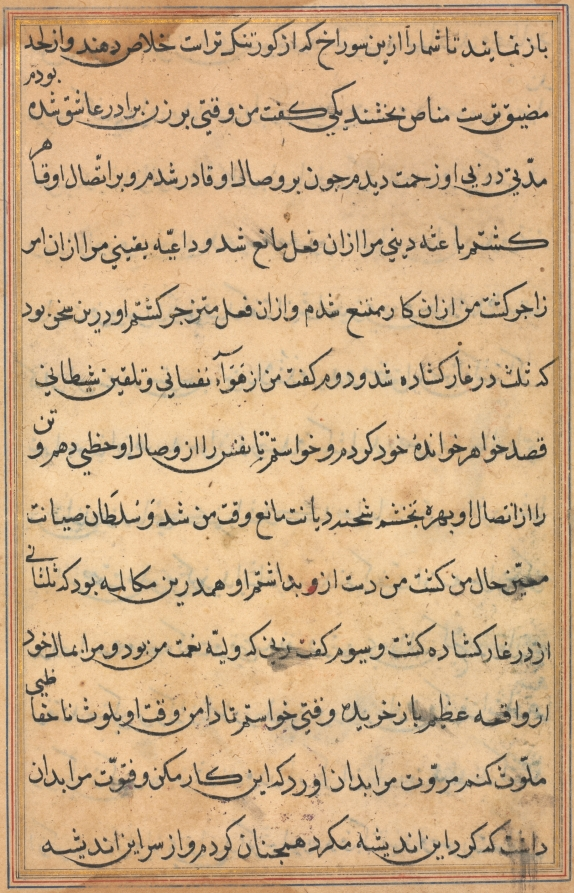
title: Page from Tales of a Parrot (Tuti-nama): text page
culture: Mughal India, court of Akbar (reigned 1556–1605)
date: c. 1560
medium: gum tempera, ink, and gold on paper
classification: Painting